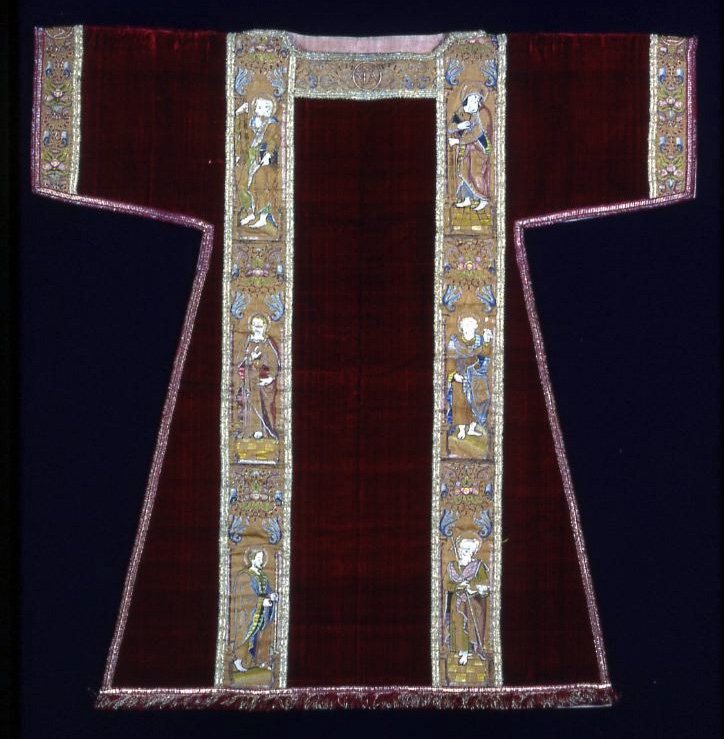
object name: Textile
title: Dalmatic with Orphrey Bands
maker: Italy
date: 19th century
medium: Silk, velvet cut, embroidered in silk floss and gold metal thread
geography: Italy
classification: textile; needlework (visual works); weaving - velvet; liturgical